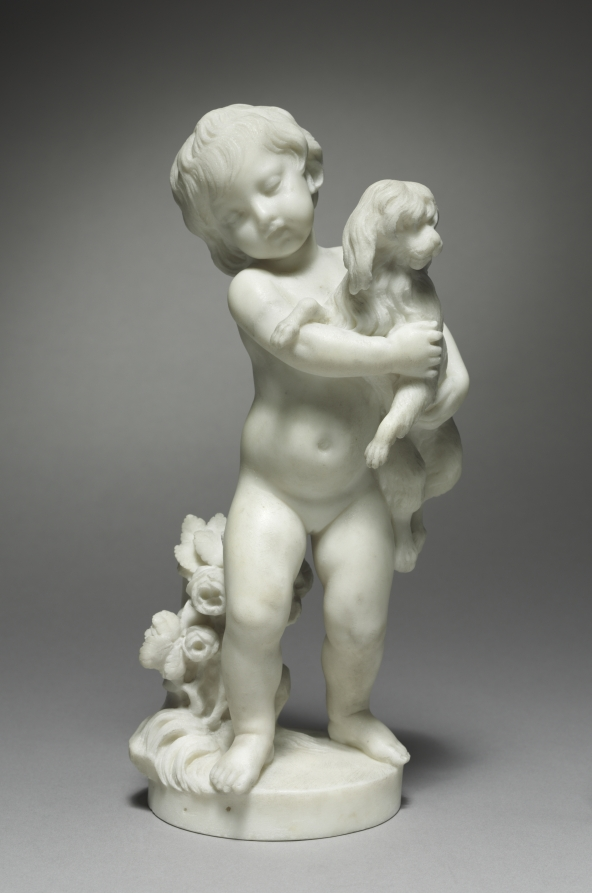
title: Faithful Love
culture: France, 19th century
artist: after Augustin Pajou (French, 1730–1809)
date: 1800s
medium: marble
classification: Sculpture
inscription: signature behind stump with roses: Pajou f(ecit) 1787.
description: These statuettes represent the opposing spectrums of love—fickle and faithful—both portrayed by Cupid. Fickle Love absent-mindedly plays with a butterfly, a symbol of the fleeting moment. Conversely, Faithful Love is accompanied by a dog, the ultimate loyal companion. These works were originally believed to be by the hand of Augustin Pajou, because the works are signed and he made nearly identical sculptures. However, due to the slightly clumsy execution and the awkward scale of the signatures, the museum now believes the statuettes were created by another artist after Pajou's design.